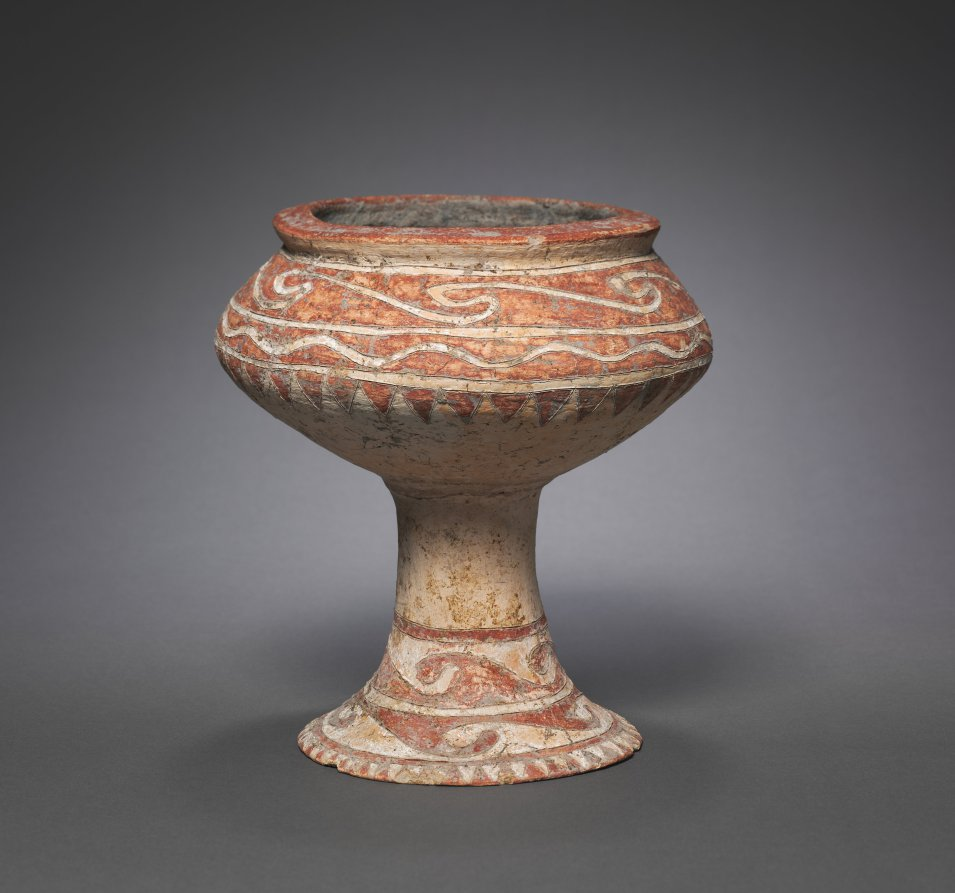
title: Tazza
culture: South East Asia, Thailand, Ban Chiang, Neolithic period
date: 3000s BCE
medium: reddish earthenware with painted and incised decoration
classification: Ceramic